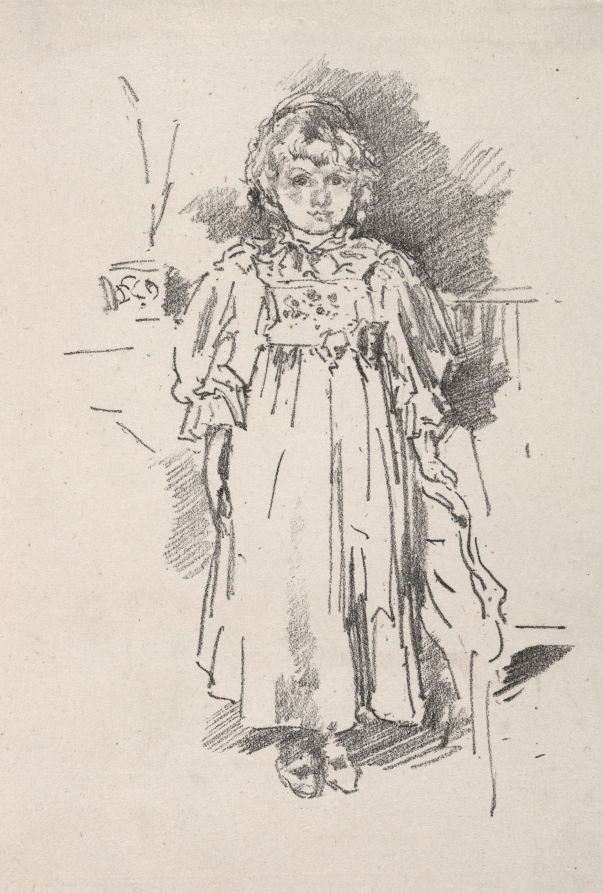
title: Little Evelyn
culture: America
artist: James McNeill Whistler (American, 1834–1903)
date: 1896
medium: lithograph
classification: Print